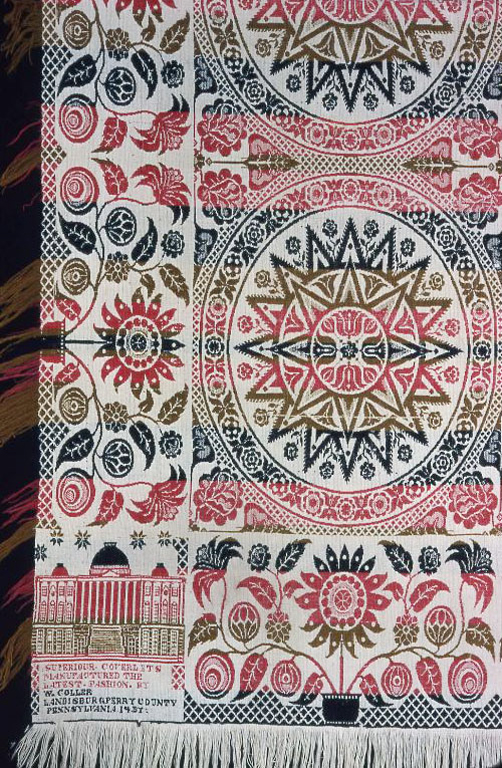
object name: Textile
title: Coverlet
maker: W. Coller (American, active c. 1850s); United States, Pennsylvania, Perry County, Landisburg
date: 1850s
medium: Cotton and wool, plain weave with plain interlacings of secondary binding warps and patterning wefts (Beiderwand); woven on loom with Jacquard attachment; one loom width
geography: Pennsylvania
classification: textile; coverlet; weaving - coverlet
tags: coverlet